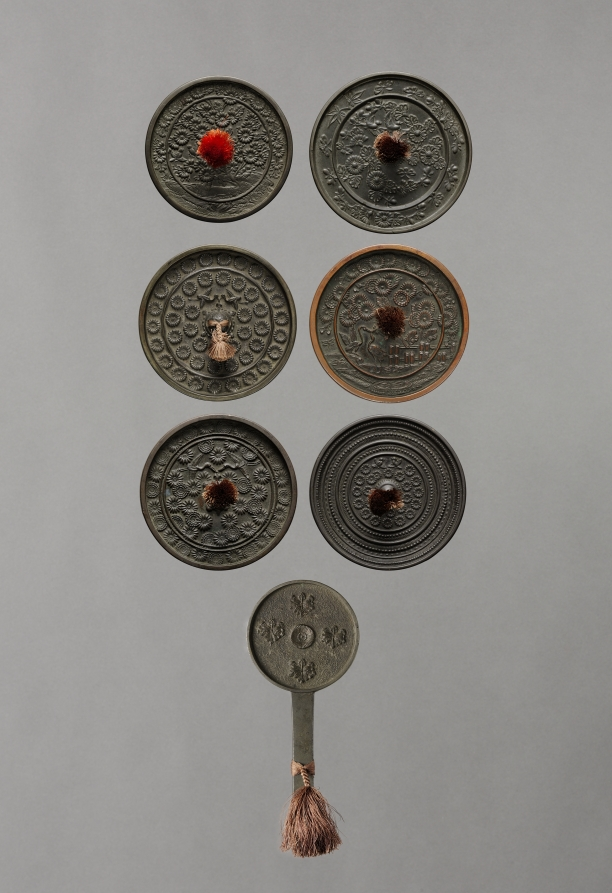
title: Mirror with Pair of Cranes in Chrysanthemum Pattern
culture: Japan, Muromachi period (1392–1573)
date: 1392–1573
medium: bronze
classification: Metalwork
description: The Japanese used chrysanthemums as decorative elements on mirrors. In the Heian period, a chrysanthemum with cranes or long-tailed birds was a common motif. Later, in the Kamakura and Muromachi periods, chrysanthemum designs were divided into three patterns with different symbolic associations: Chrysanthemum with Cranes represented longevity; Water Flowing suggested longevity as well as the Noh drama Kikujido, or Chrysanthemum Boy; and East Fence alluded to the poem "Drinking Wine" by Tao Yuanming (AD 365-427). Here, the mirror featuring Buddhist iconography (kyojo) and a chrysanthemum design on the back shows that the flower was also appreciated in the context of Buddhism in the Kamakura period.